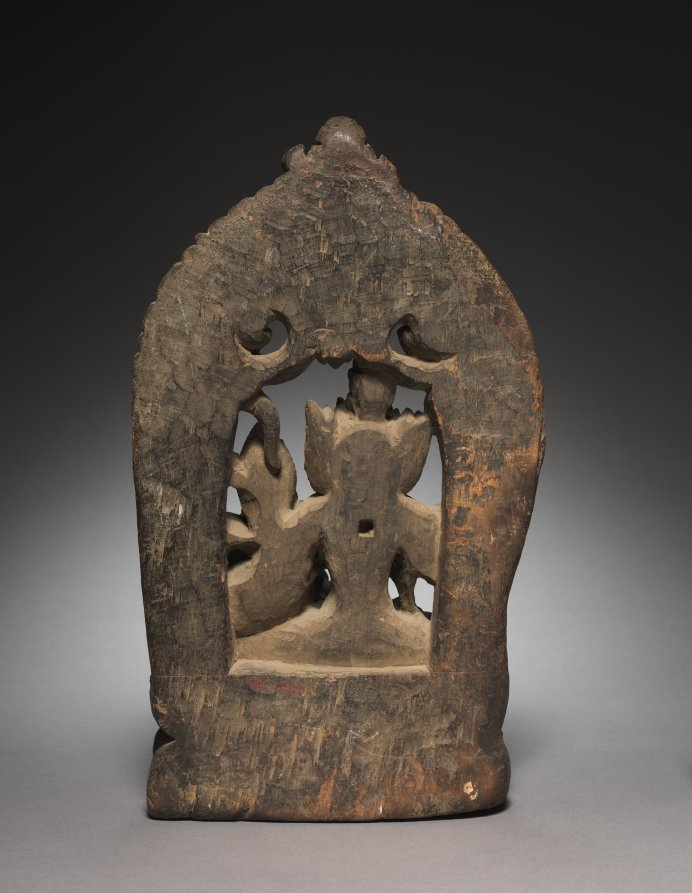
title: Tantric Form of Avalokiteshvara with Consort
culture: Nepal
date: 1500s–1600s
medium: wood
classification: Sculpture